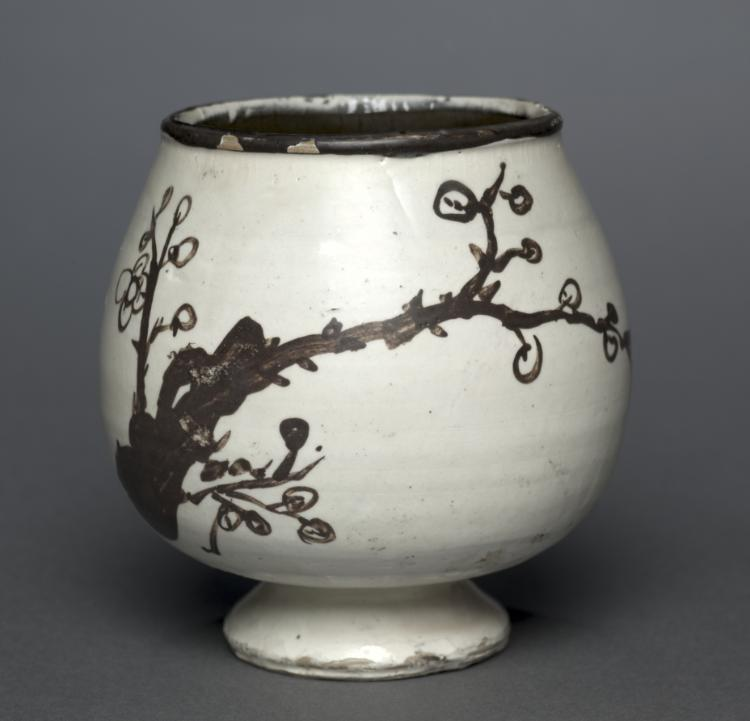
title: Cup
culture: Northern China, Jin dynasty (1115-1234) or Yuan dynasty (1271-1368)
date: 1200s–1300s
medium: stoneware with underglaze painted decoration, Cizhou ware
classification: Ceramic